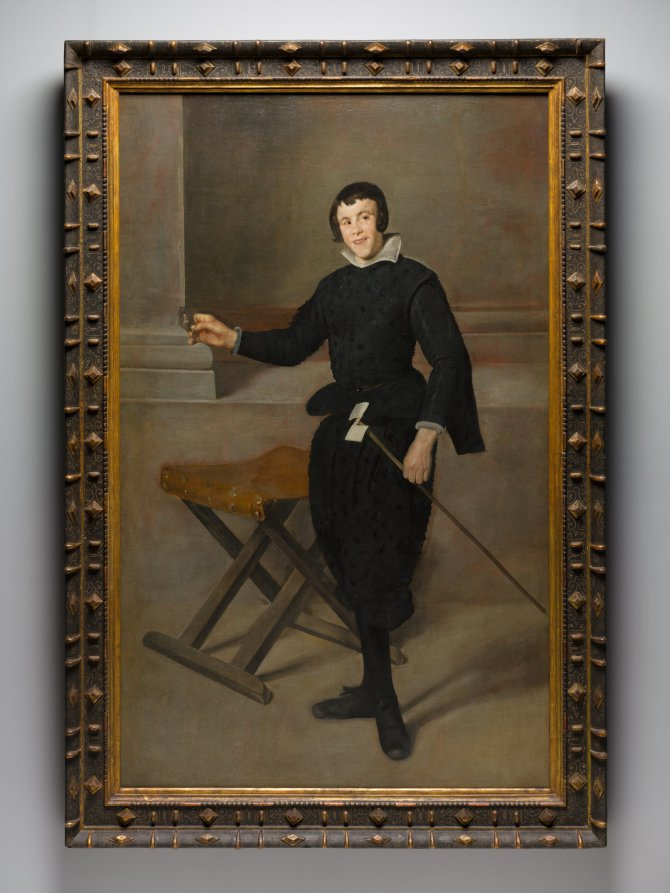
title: Portrait of the Jester Calabazas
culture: Spain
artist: Diego Velázquez (Spanish, 1599–1660)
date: c. 1631–32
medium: oil on canvas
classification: Painting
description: Calabazas, a jester in the court of King Philip IV of Spain, had physical and mental disabilities, a state that the artist emphasizes, rather than tries to hide. While the Spanish court prized and doted upon people with disabilities such as Calabazas, Velázquez transformed their depiction in portraiture. This startling work uses the format of the formal, full-length court portrait to present a type of person who was generally perceived as marginal at this point in history and profoundly humanizes him.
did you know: Calabazas holds a wind-driven pinwheel and a miniature portrait of a woman, together suggesting the inconstancy of love.